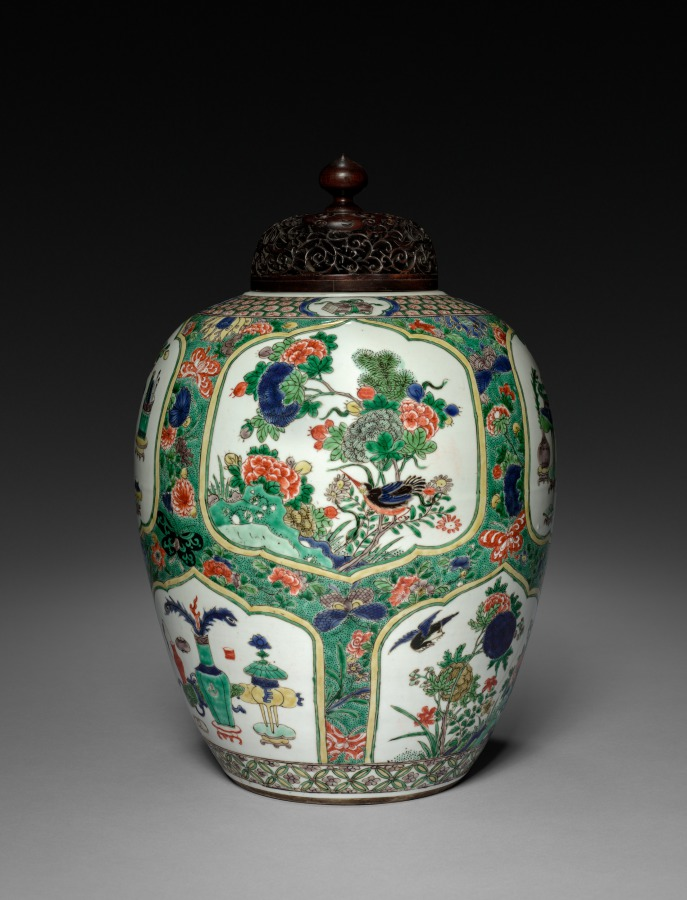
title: Vase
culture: China, Qing dynasty (1644-1911), Kangxi reign (1661-1722)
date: 1622–1722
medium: porcelain with underglaze decoration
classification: Ceramic